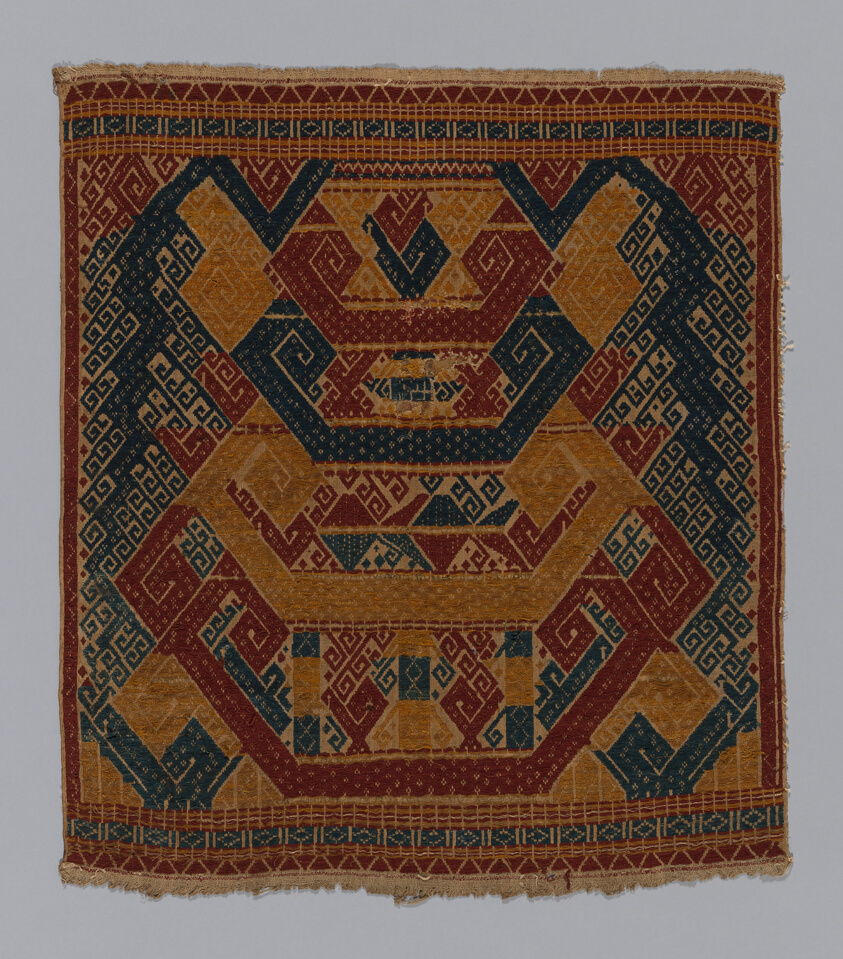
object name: Textile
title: Tampan (Ceremonial Cloth)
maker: Paminggir (Indonesia, South Sumatra, Lampung)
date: 19th century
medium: Cotton, gilt-paper-strip-wrapped silk, and gilt metal, plain weave with supplementary patterning wefts; applied gilt metal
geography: Indonesia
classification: textile; weaving; costume